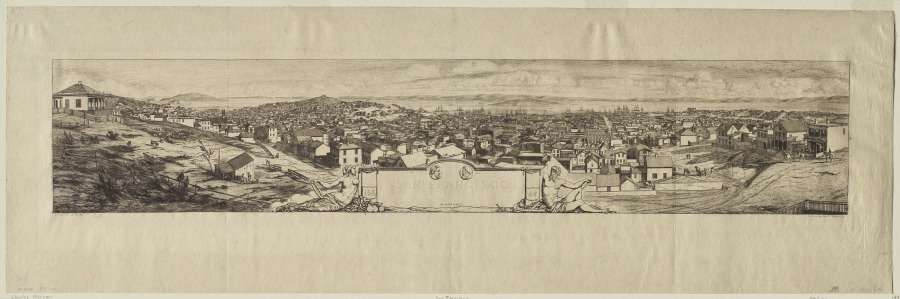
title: San Francisco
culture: France, 19th century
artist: Charles Meryon (French, 1821–1868)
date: 1856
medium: etching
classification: Print